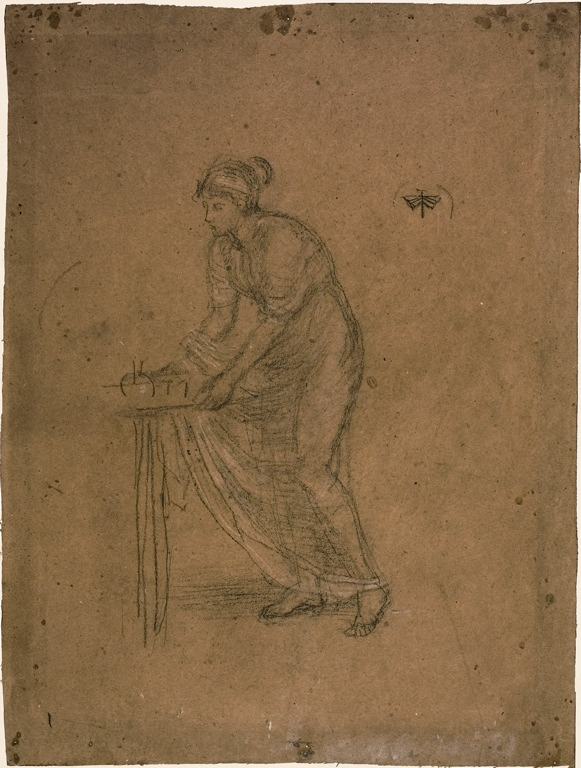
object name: Drawing and Watercolor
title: Draped Model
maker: James McNeill Whistler (American, 1834-1903)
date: 1866/69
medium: Black chalk with touches of white chalk, on brown wove paper laid down on ivory board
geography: United States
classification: chalk; drawings (visual works); prints and drawing; paper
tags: Century of Progress, world's fairs, Chicago World's Fairs